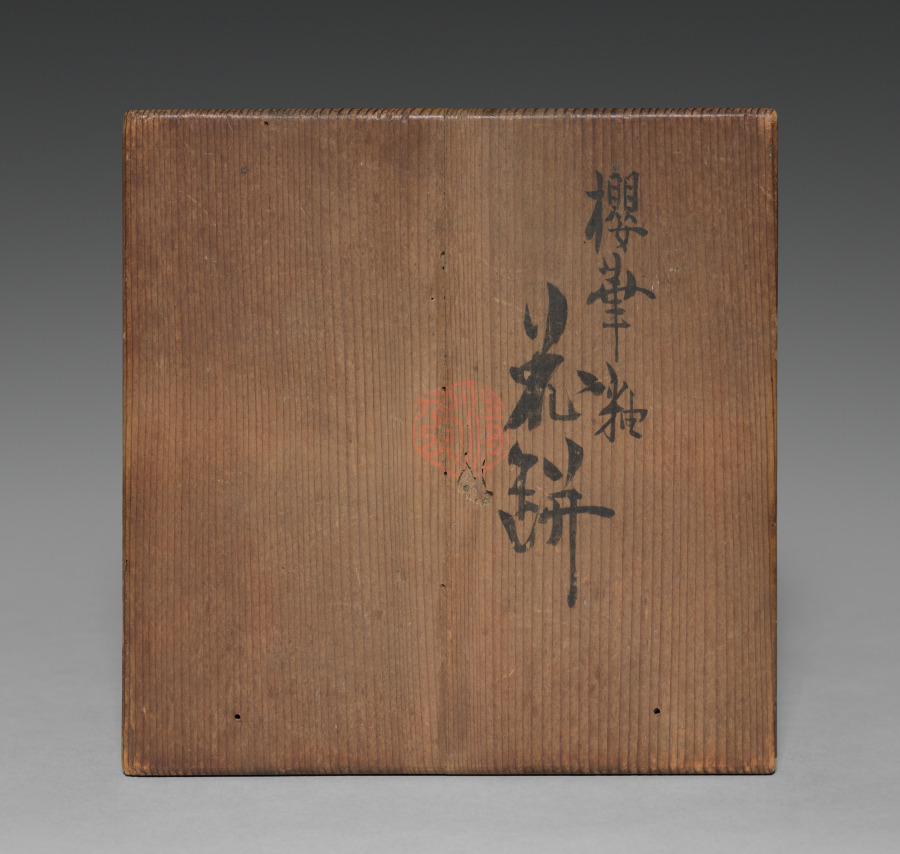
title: Gu-Shaped Flower Vase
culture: Japan, Meiji period (1868–1912)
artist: Seifū Yohei III (Japanese, 1851–1914)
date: 1893–97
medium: Glazed porcelain with molded and carved designs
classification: Ceramic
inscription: 大日本清風造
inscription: This gu-shaped vase has “cherry blossom glaze” (ōkayū), according to the inscription on its box.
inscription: A label affixed to the side of the box gives a sense of how previous owners conceived of the piece. Although the label is partially abraded, one can make out the character nezu 鼠, used in the names of numerous light pinks, from Naniwa pink (Osaka pink) to Miyako pink (Kyoto, or capital, pink). Also legible is the phrase hakugōrai, a broad term that can describe a shade of white associated with ceramics discovered in Korean tombs, but often applied to other ceramics of similar coloration, many from Chinese kilns, including Ding (J. Tei) ware of the Northern Song dynasty.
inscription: 清風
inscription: 帝室技芸員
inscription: 清風與平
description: Seifū Yohei III was the most prominent head of a ceramics studio in Kyoto that specialized in Chinese-style porcelains and especially items for use in sencha (煎茶), or the drinking of steeped-leaf tea with companions. Sencha was popular among the bunjin of Kyoto and Osaka, who often enjoyed it as part of their emulation of Chinese culture. While sencha was by design less formal than the Japanese tea ceremony, it still featured the display of treasured objects. Prized Chinese antiquities were generally unobtainable, so substitutes such as the Gu-Shaped Flower Vase were much in demand.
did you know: This gu-shaped vase has “cherry blossom glaze” (ōkayū), which Yohei III invented in 1890.